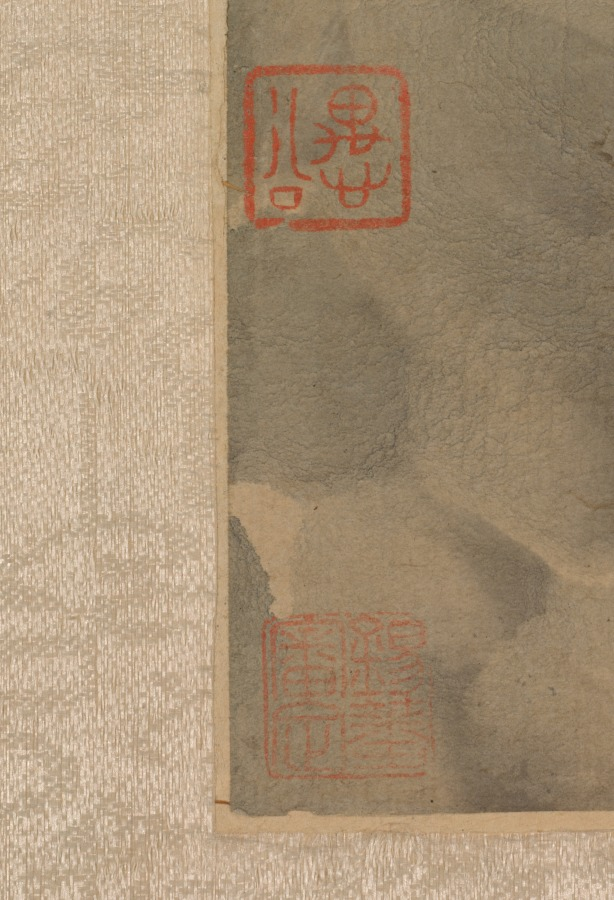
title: Flowering Plants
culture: China, Qing dynasty (1644-1911)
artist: Wu Rangzhi (Chinese, 1799–1870)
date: 1862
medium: hanging scroll, ink and color on paper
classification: Painting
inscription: Signed and dated inscription by the artist with one seal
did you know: Painter and calligrapher Wu Rangzhi was also an expert in seal cutting.